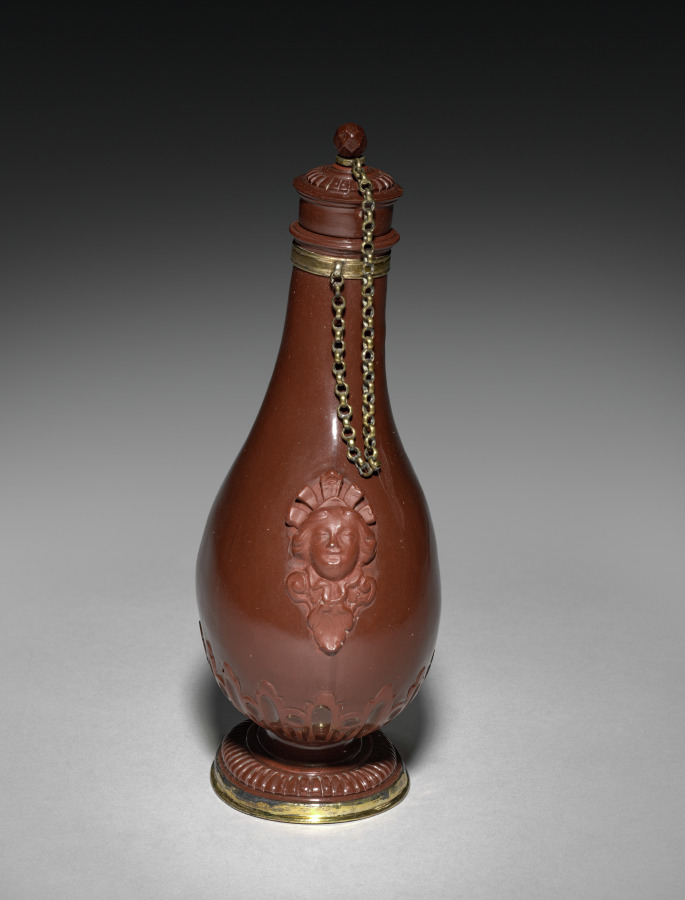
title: Pilgrim Bottle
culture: Germany, Meissen, 18th century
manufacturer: Meissen Porcelain Factory (German, est. c. 1710)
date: c. 1715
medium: polished red stoneware, silver-gilt mounts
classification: Ceramic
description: Throughout the early 1700s porcelain was imported to Europe from China and Japan, until the correct formula to produce it was developed by Johann Friedrich Böttger and a collaborator, which led to the establishment of the Meissen factory in 1710. Red stoneware inspired by Chinese Yixing ware and white porcelain were produced in Meissen under Böttger. Its fine red stoneware was so hard that it could be polished on a lapidary’s wheel—as was the body of this bottle.